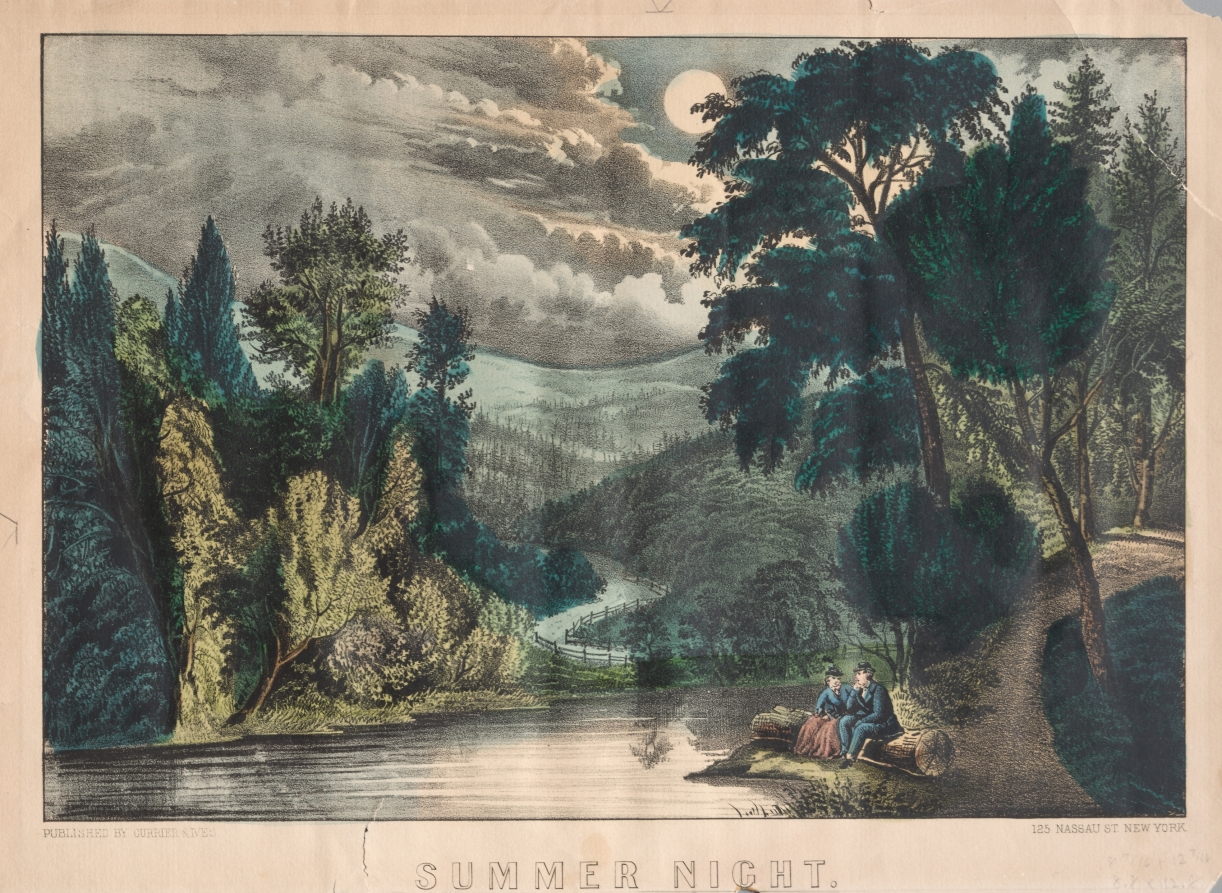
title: Summer Night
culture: America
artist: and James Merritt Ives (American, 1824–1895)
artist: Nathaniel Currier (American, 1813–1888)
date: c. 1857–72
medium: lithograph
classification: Print